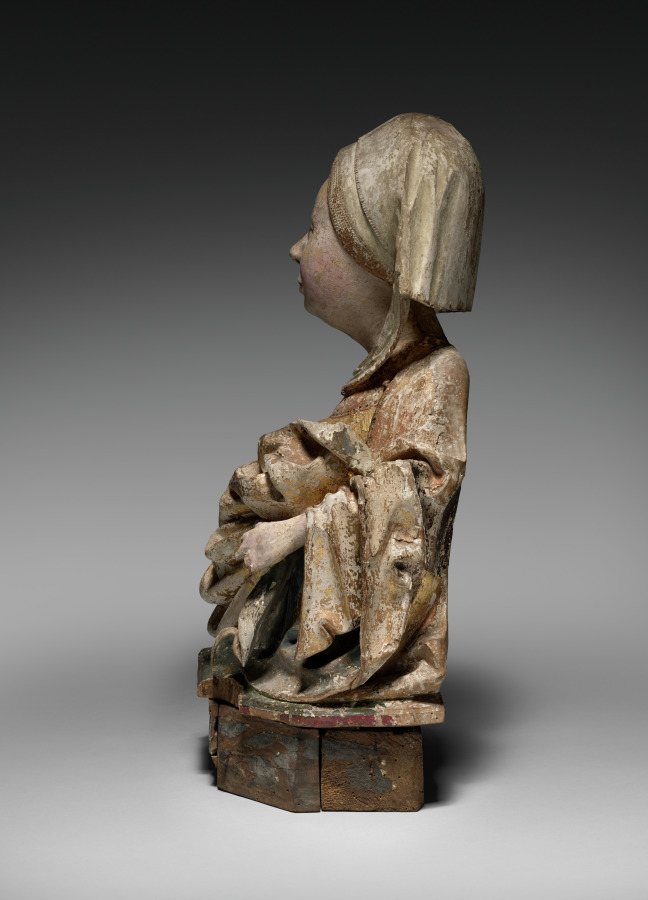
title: Female Bust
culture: Austria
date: c. 1470–1500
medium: Painted and gilded lindenwood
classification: Sculpture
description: This female bust is part of a series of three in the museum's collection. The identity of the figures has been speculated by scholars but without resolution. Because this and the other female busts in the series do not retain their attributes, it is difficult to know their original purpose. It is possible that they may have once formed a group of female saints from the predella of a large altarpiece. Since the sculpture is not carved in the round, this hypothesis has merit. Another recent proposal is that this and the other sculptures may be from a series of female busts representing the wise and foolish virgins referenced in Matthew 25:1-13, a parable by Jesus admonishing listeners to be spiritually prepared.